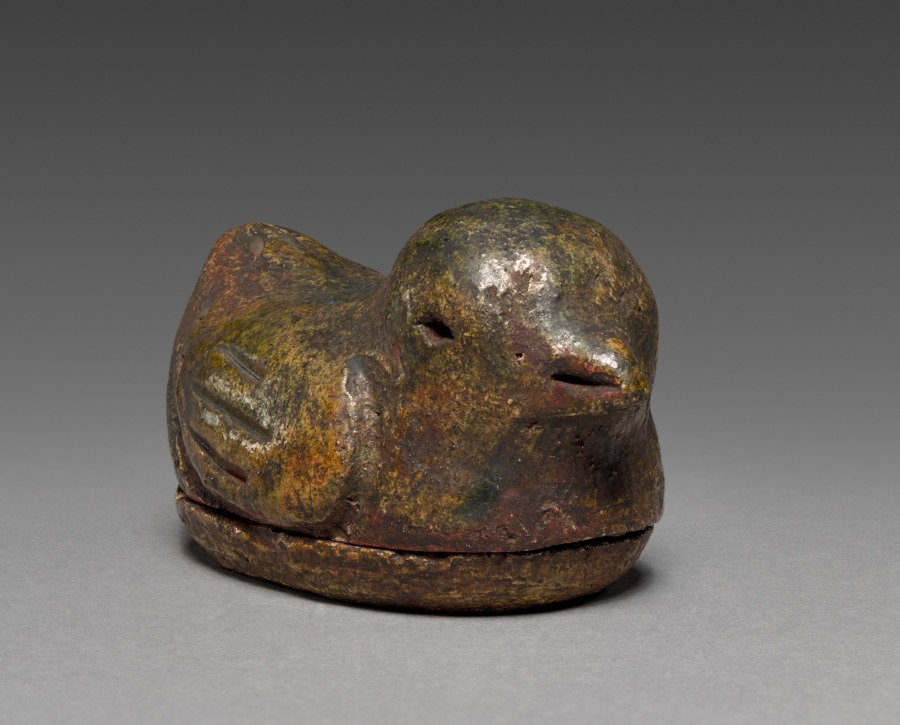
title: Incense Container (Kōgō) in the Shape of a Bird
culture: Japan, Edo period (1615–1868)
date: c. 1700–1868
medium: Stoneware with glaze and carved decoration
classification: Ceramic